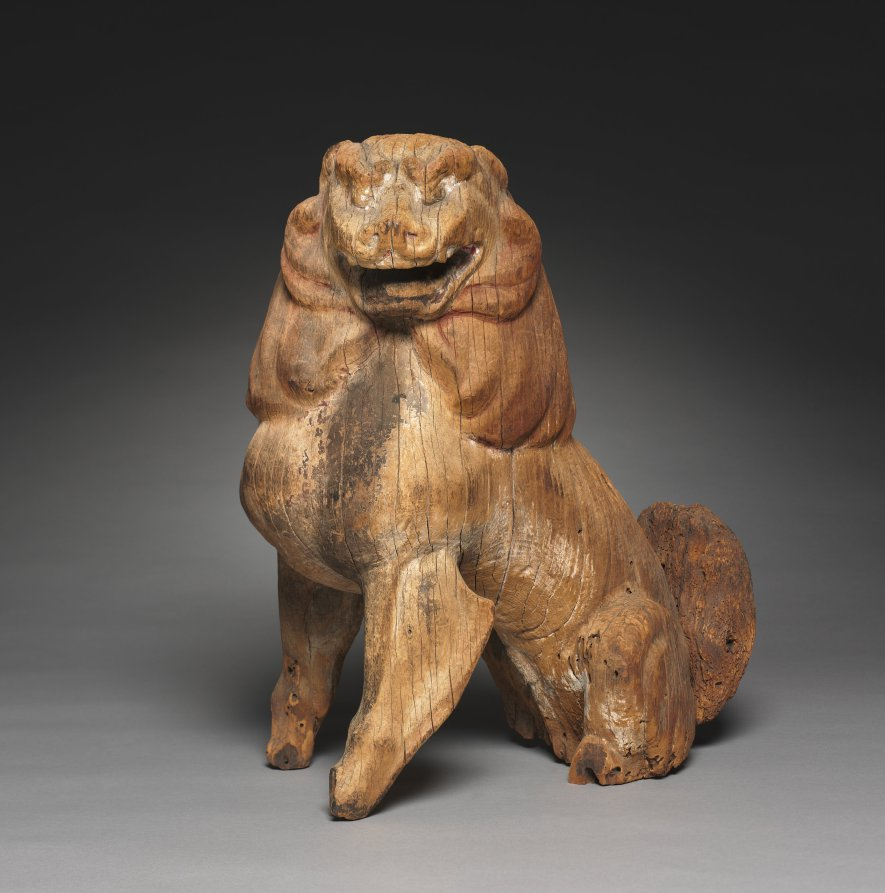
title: Guardian Animal: Karashishi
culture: Japan, Kamakura period (1185–1333)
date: 1300s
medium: Wood with traces of color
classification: Sculpture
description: Placed at the entrance to shrines and temples in Japan, guardian figures ward off evil spirits. These guardians used to be painted red and white and are distinguishable by their facial expressions: the open-mouthed animal is a karashishi, or “Chinese lion,” while the close-mouthed beast, which once had a single horn protruding from its head, is called a komainu, or “Korean dog.” The mouths correspond to infinity, the syllables ah (open) and um (closed), or the alpha and omega. This pairing was widespread in ancient times in Chinese territories and likely found its way to Japan via kingdoms in Korea.